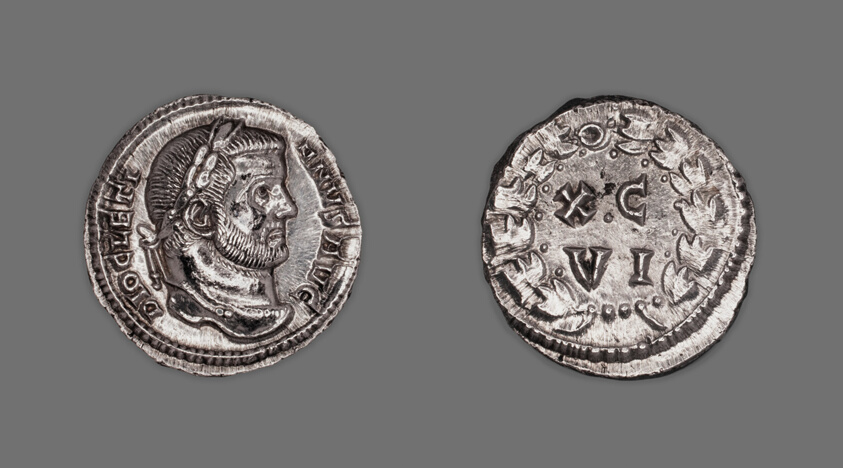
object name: Coin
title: Argenteus (Coin) Portraying Emperor Diocletian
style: roman (ancient, style or period), tetrarchic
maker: Roman, possibly minted in Carthage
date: 300, issued by Diocletian or Maximianus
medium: Silver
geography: Roman Empire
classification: coin; ancient art